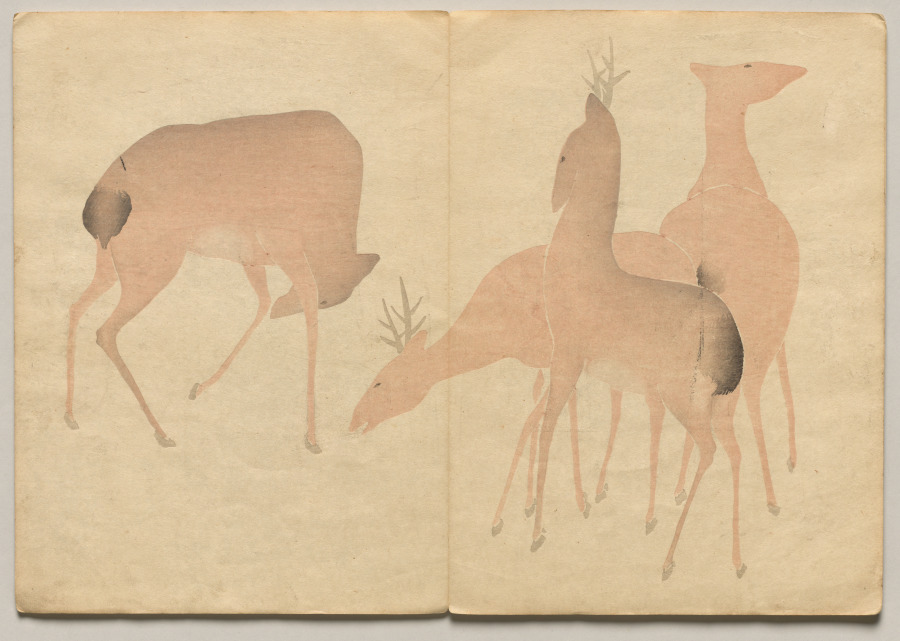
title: Scene from The Kōrin Picture Book (Volume 1)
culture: Japan, Edo period (1615–1868)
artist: Nakamura Hōchū (Japanese, d. 1819)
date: 1800s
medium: color woodblock printed book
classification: Bound Volume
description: Ogata Korin (1658-1716) was one of the most admired artists of Rimpa, or "decorative school painting." These books by the charming later-generation Rimpa artist Hochu record Korin's inventive designs.